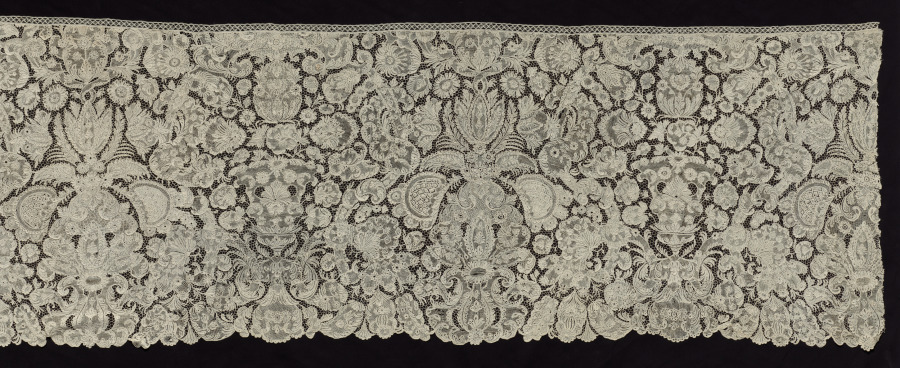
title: Lace Panel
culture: France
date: 1740–50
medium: Silk or cotton: needle lace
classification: Lace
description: The motifs in this lace panel were created separately and then joined with plaits and picot filling.